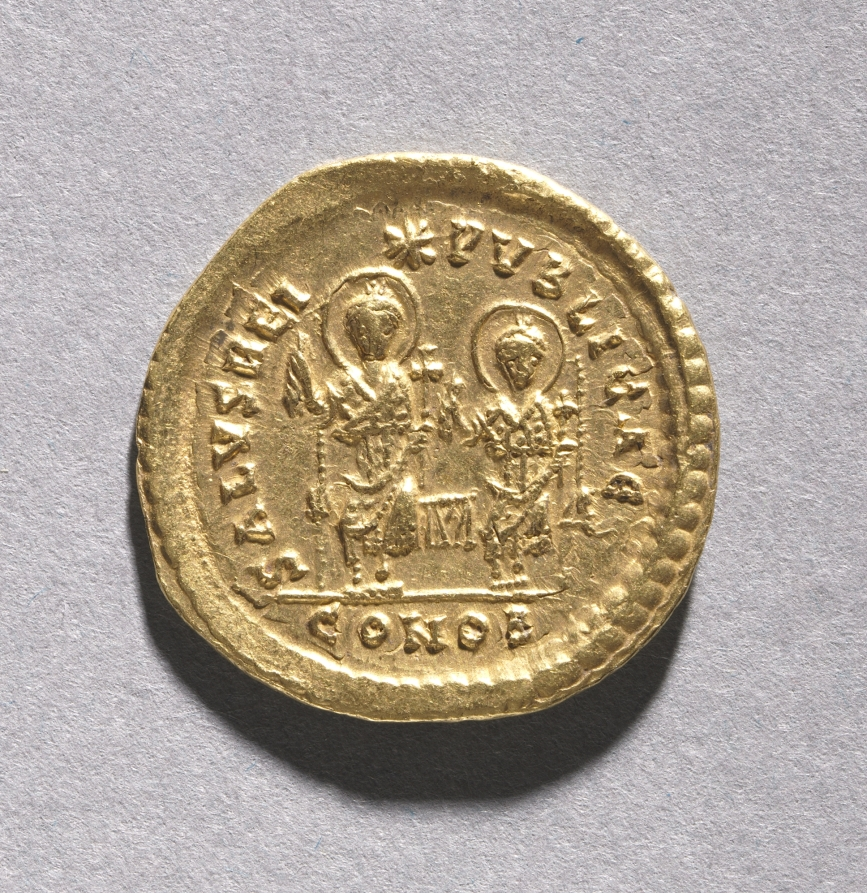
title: Solidus of Theodosius II and Valentinian III (reverse)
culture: Byzantium, Constantinople, Byzantine period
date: 408–425 CE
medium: gold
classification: Coins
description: Byzantine Gold Coins The vast number of surviving Byzantine coins attests to the level of trade across the empire. Controlled and supervised by the emperor, the producers of coins took care to represent his authority and reflect his stature. Talented artists were recruited to engrave the dies (molds) used for the striking of coins. Emperors increasingly came to include their heirs and co-emperors on their coinage, as well as other family members or even earlier rulers. Coins were recognized, then as now, as small, portable works of art. With their inscriptions and images, Byzantine coins provide valuable documentation of historical events and a record of the physical appearance of the emperors. The coins shown here include the solidus, the basic gold coin of 24 karats; the tremissis, a gold coin of one-third the weight and value of the solidus; and the nomisma, which in the 10th century replaced the solidus as the standard gold coin.